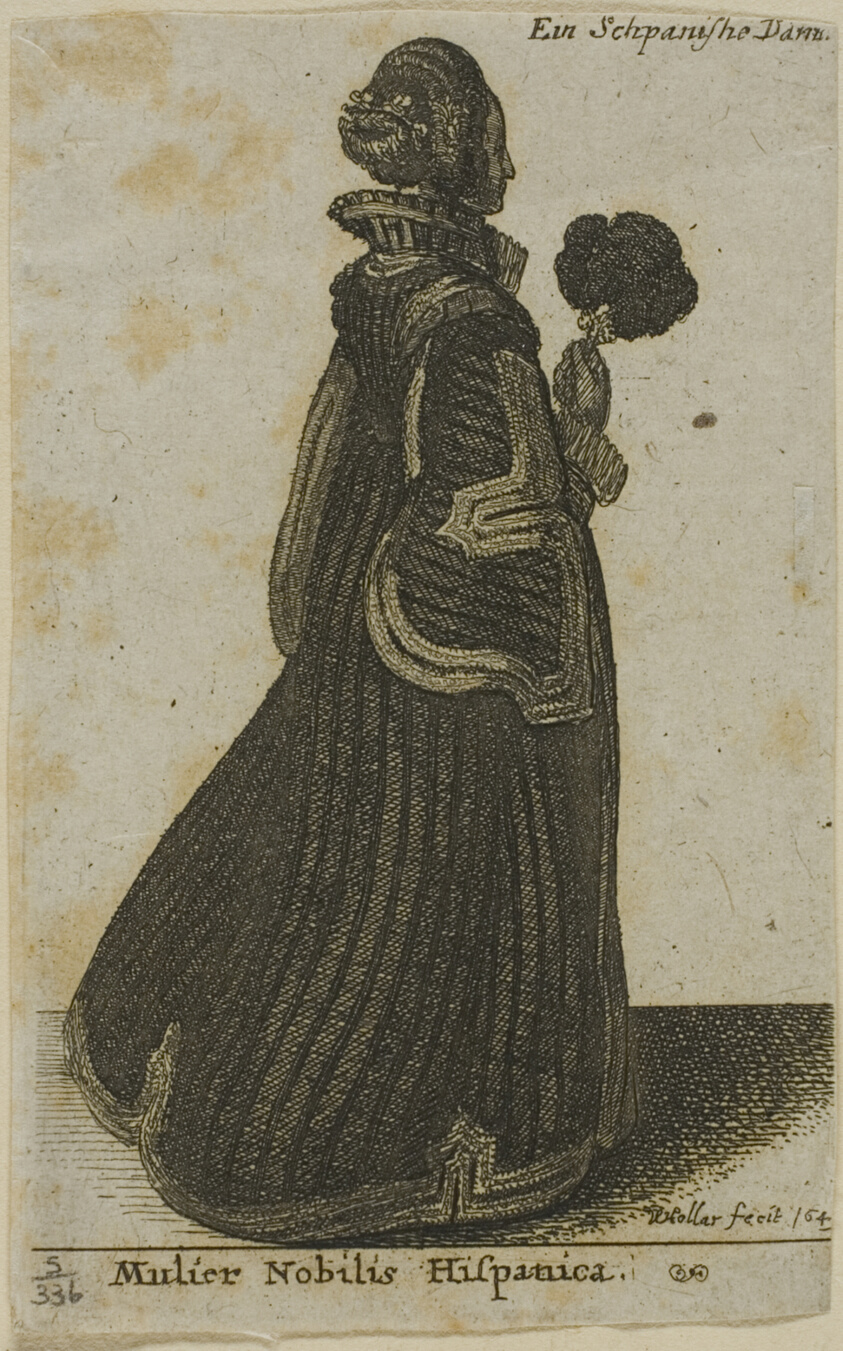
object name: Print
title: Spanish Noblewoman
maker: Wenceslaus Hollar (Bohemian, 1607-1677)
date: 1649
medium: Etching on gray Asian paper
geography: Bohemia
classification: etching; print; prints and drawing